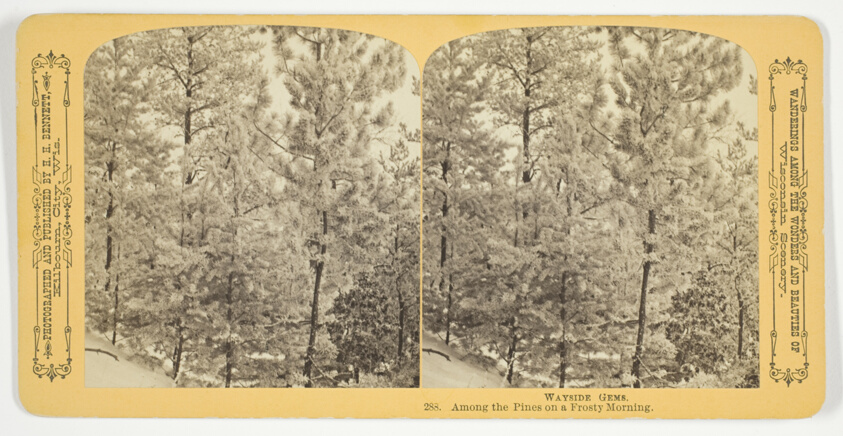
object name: Photograph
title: Among the Pines on a Frosty Morning, No. 283 from the series "Wayside Gems"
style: 19th century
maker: Henry Hamilton Bennett (American, born Canada, 1843-1908)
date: 1870/89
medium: Albumen print, stereo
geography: Wisconsin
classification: photography; photograph; albumen silver print; stereograph (albumen)